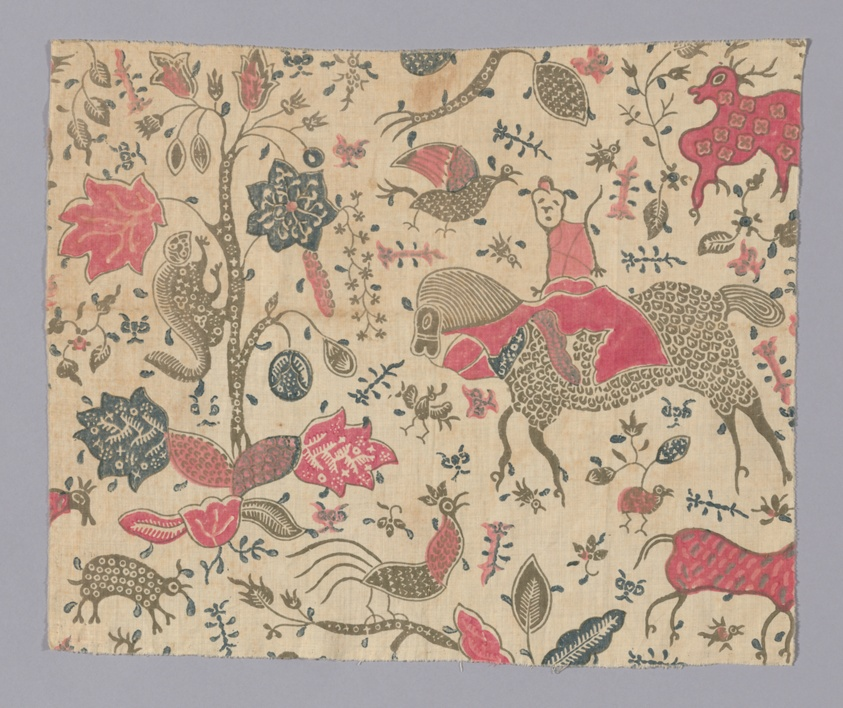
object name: Textile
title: Panel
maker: India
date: 19th century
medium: Cotton; woodblock printed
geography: India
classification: textile; weaving; weaving - printed